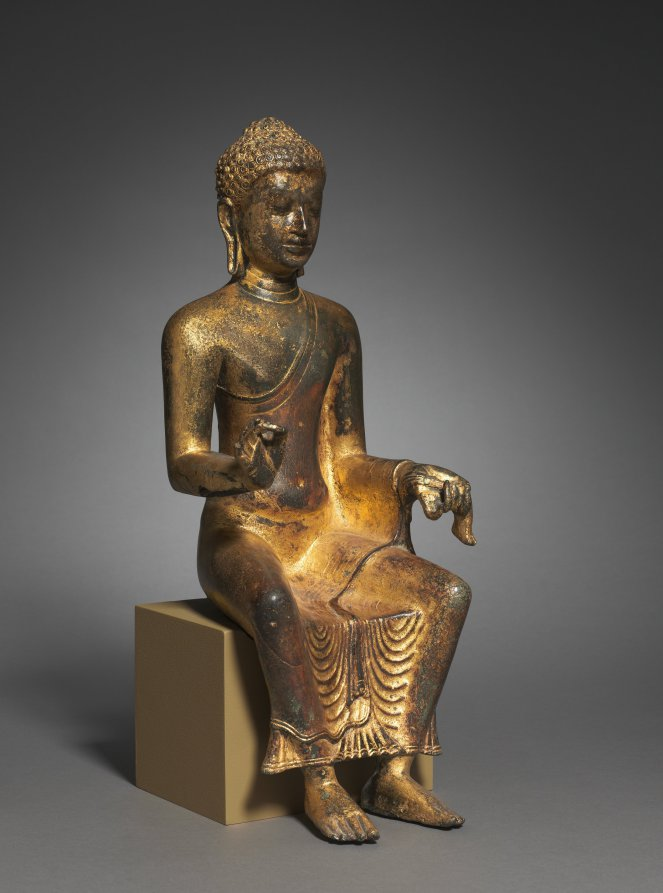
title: Enthroned Buddha Preaching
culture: Myanmar or Thailand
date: 700s–800s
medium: copper alloy with gilding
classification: Sculpture